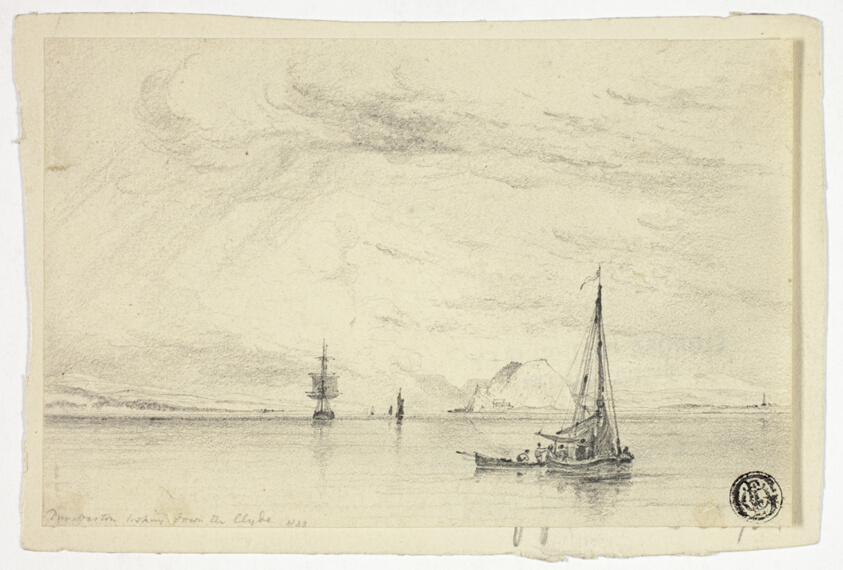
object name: Drawing and Watercolor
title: Dunbarton Looking from the Clyde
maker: Anthony Vandyke Copley Fielding (English, 1787-1855)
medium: Graphite, on cream wove paper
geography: England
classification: graphite; drawings (visual works); prints and drawing